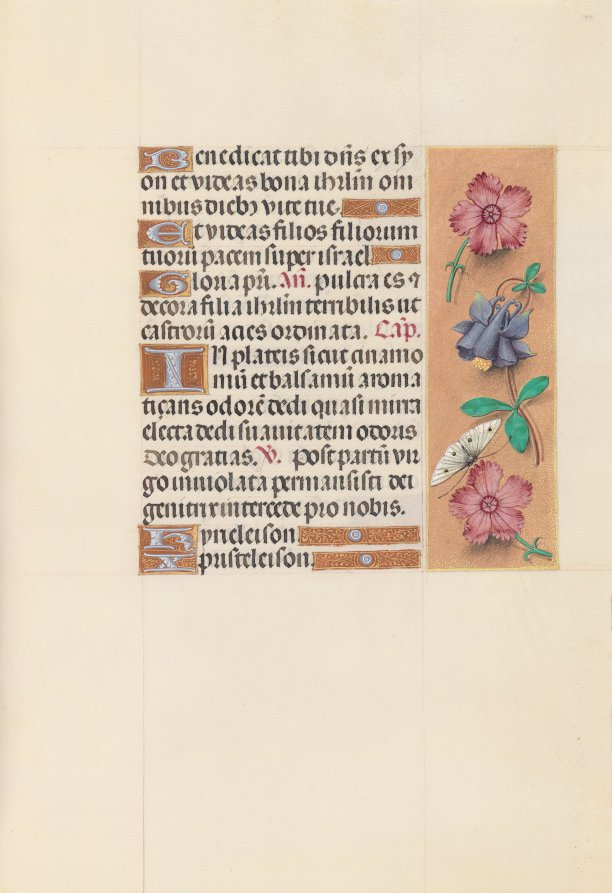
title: Hours of Queen Isabella the Catholic, Queen of Spain: Fol. 144r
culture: Flanders, Ghent and Bruges, late 15th century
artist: Master of the First Prayerbook of Maximillian (Flemish, c. 1444–1519)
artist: and Associates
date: c. 1500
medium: ink, tempera, and gold on vellum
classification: Bound Volume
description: This manuscript was illuminated by a circle of at least five highly organized manuscript painters active in the Flemish cities of Ghent and Bruges. The principal illuminator was Alexander Bening, who painted the majority of the book's miniatures. Manuscripts produced by this circle of artists are renowned for the decoration of their borders, which typically feature a rich variety of realistically-painted flowers, birds, and butterflies. This prayer book, called a book of hours, was intended not for a cleric, but for the private devotions of a lay person-in this case, Isabella the Catholic, Queen of Spain (1451-1504). Isabella's coat of arms embellishes the book's frontispiece. It is unlikely that the book was commissioned by the Queen herself; rather, she probably received it as a diplomatic gift from someone courting her patronage, perhaps Cardinal Francisco Jimenez de Cisneros. A Franciscan friar, Jimenez was dependent upon Isabella for his advancement, first to the post of Queen's confessor in 1492, and then to Archbishop of Toledo in 1495.